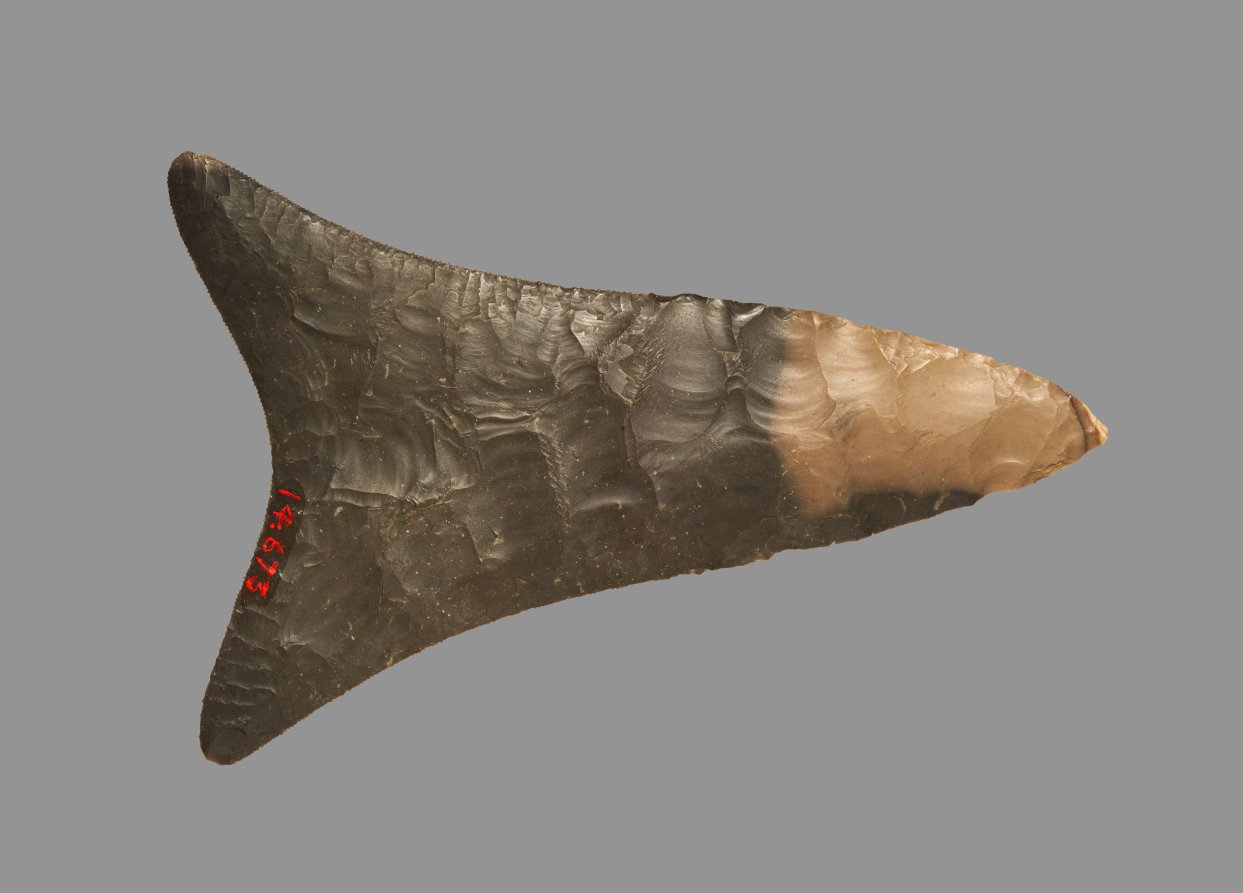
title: Fishtail Knife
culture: Egypt, Predynastic (5000–2950 BCE), Naqada Ia–IIa (3900–3300 BCE)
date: 4500–4000 BCE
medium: dark brown- to dark green-colored flint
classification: Implements